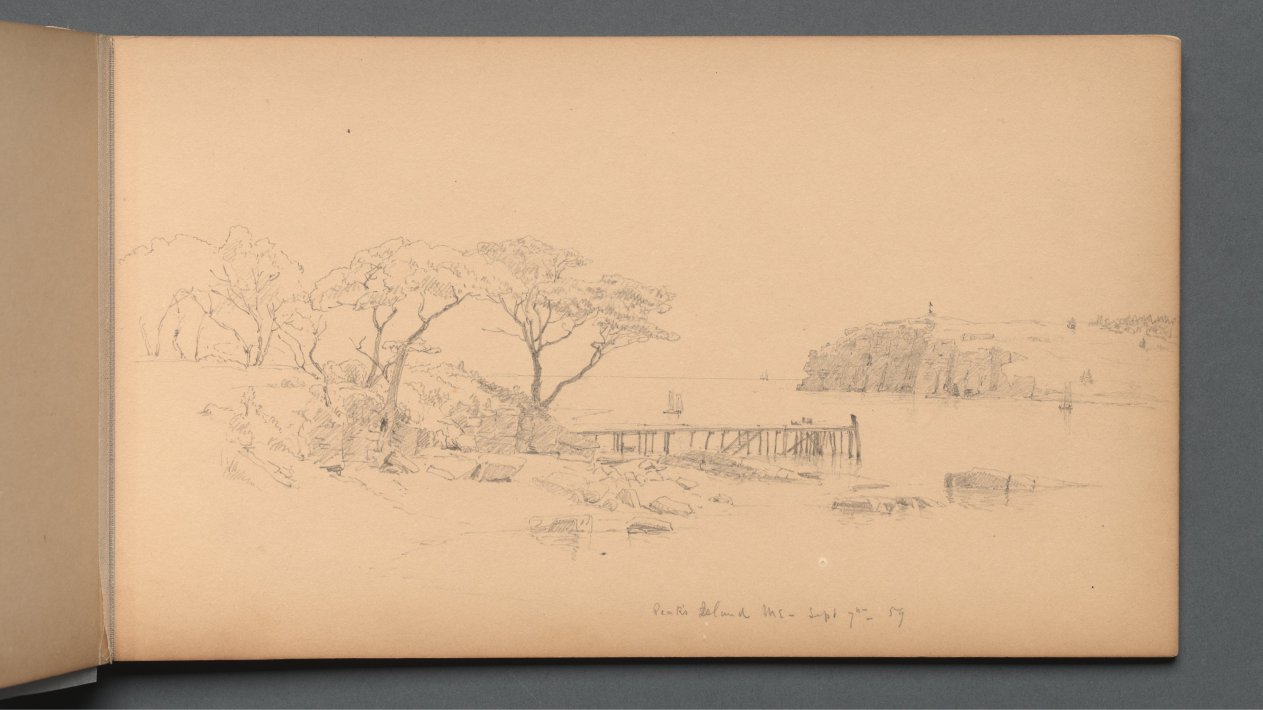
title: Sketchbook, page 20: "Peak's Island, ME, Sept. 7th, 59"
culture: America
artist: Sanford Robinson Gifford (American, 1823–1880)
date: 1859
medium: graphite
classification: Bound Volume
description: Gifford was an American landscape painter belonging to the second generation of Hudson River school artists. Based in New York City with a studio at the Tenth Street Studio Building, Gifford took annual summer trips to the Catskills, the Adirondacks, and other scenic locations in New England. This sketchbook accompanied the artist on his expedition in 1859 to New Hampshire and Maine, where he drew sites such as Dixville Notch, the White Mountains, and Peaks Island, Casco Bay. Gifford used such graphite studies as the basis for oil paintings worked up in his studio, such as A Home in the Wilderness (1866).